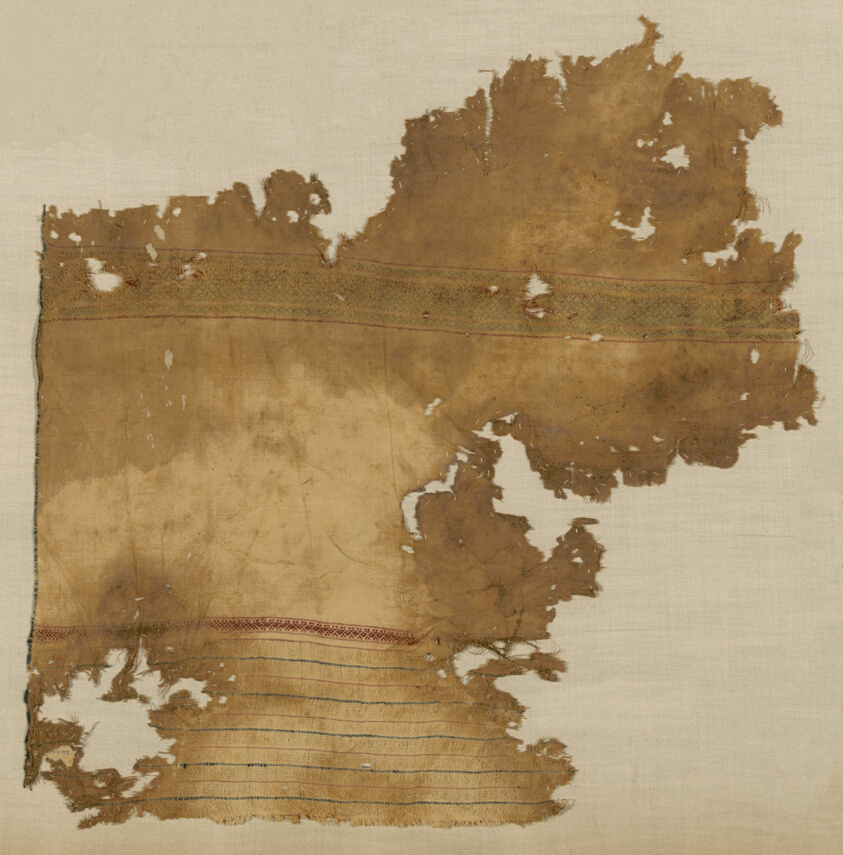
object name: Textile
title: Fragment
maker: Egypto-Arabian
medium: Fragment of plain cloth in natural colored linen with compound borders in red and blue silk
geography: Egypt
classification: textile; weaving